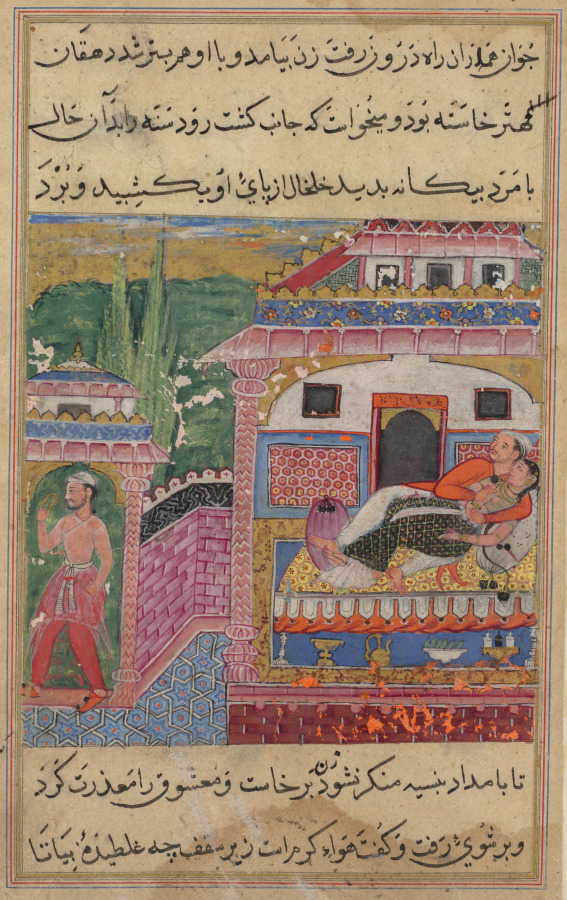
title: The farmer, father of the son with the deceitful wife, steals away with her anklet while she is in bed with her lover, from a Tuti-nama (Tales of a Parrot): Eighth Night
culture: Mughal India, court of Akbar (reigned 1556–1605)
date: c. 1560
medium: gum tempera, ink, and gold on paper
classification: Painting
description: The unfaithful wife and her lover were discovered by her father-in-law in their rendezvous place. Thinking she was asleep, he took her anklet as evidence of her infidelity, planning to confront her with it later. The lovers, still in bed, were awakened and witnessed him leaving by the gate, holding her anklet. Under the bed are a pitcher and basin for water, a dish of breath-freshening and mildly narcotic pan leaves, along with bottles of perfumes, all the accoutrements for a romantic encounter.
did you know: Areas of the original, orange paint are visible beneath the lovers’ bed.